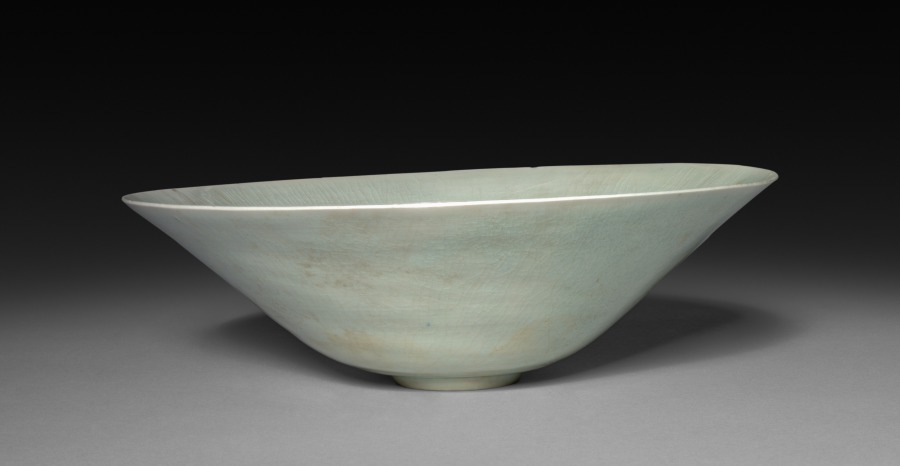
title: Coniform Bowl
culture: China, Song dynasty (960-1279)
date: 960–1279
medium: White porcelain, Yingqing ware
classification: Ceramic